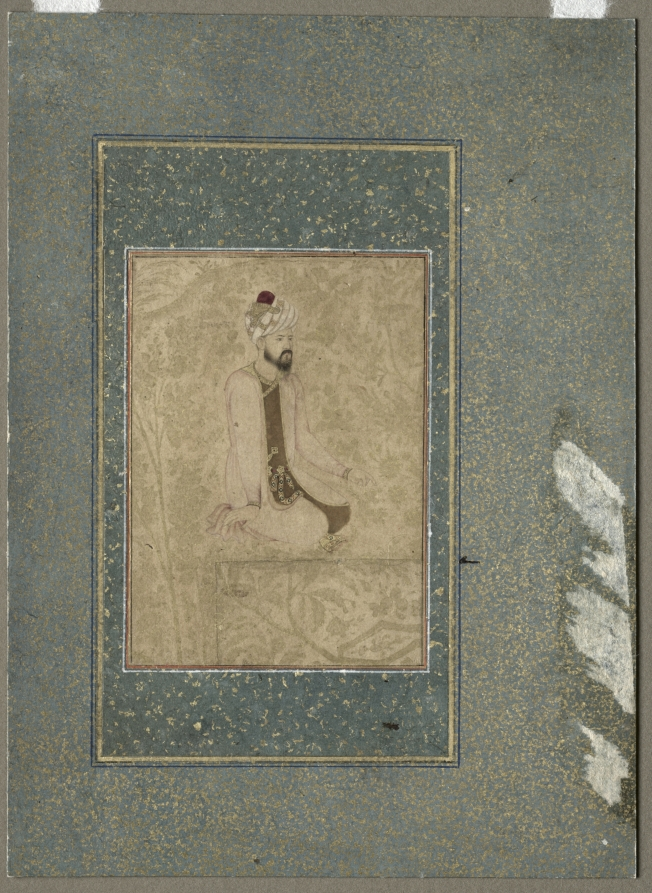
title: Seated Scholar, Border Fragment from the Teheran/Berlin album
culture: India, Mughal Dynasty (1526-1756)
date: c. 1605–1610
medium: color on paper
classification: Painting